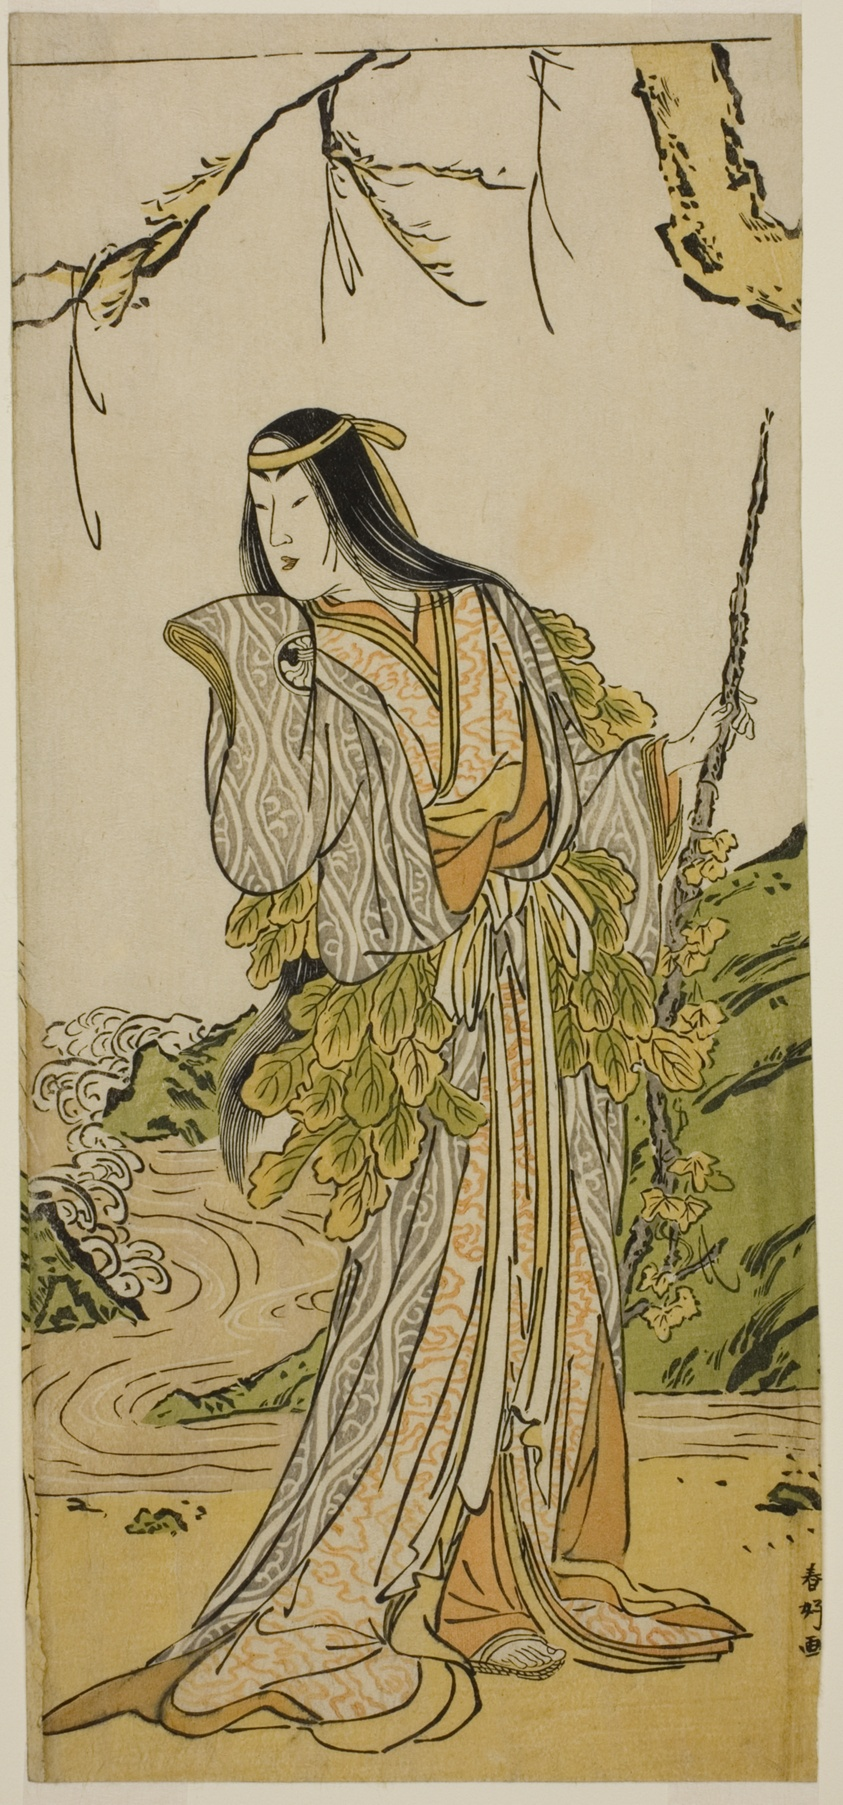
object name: Print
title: The Actor Segawa Kikunojo III as Yamauba in the Play Otokoyama Furisode Genji, Performed at the Kiri Theater in the Eleventh Month, 1785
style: Japanese (culture or style)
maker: Katsukawa Shunko I; Japanese, 1743-1812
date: c. 1785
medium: Color woodblock print; hosoban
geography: Japan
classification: woodblock print; print; asian art